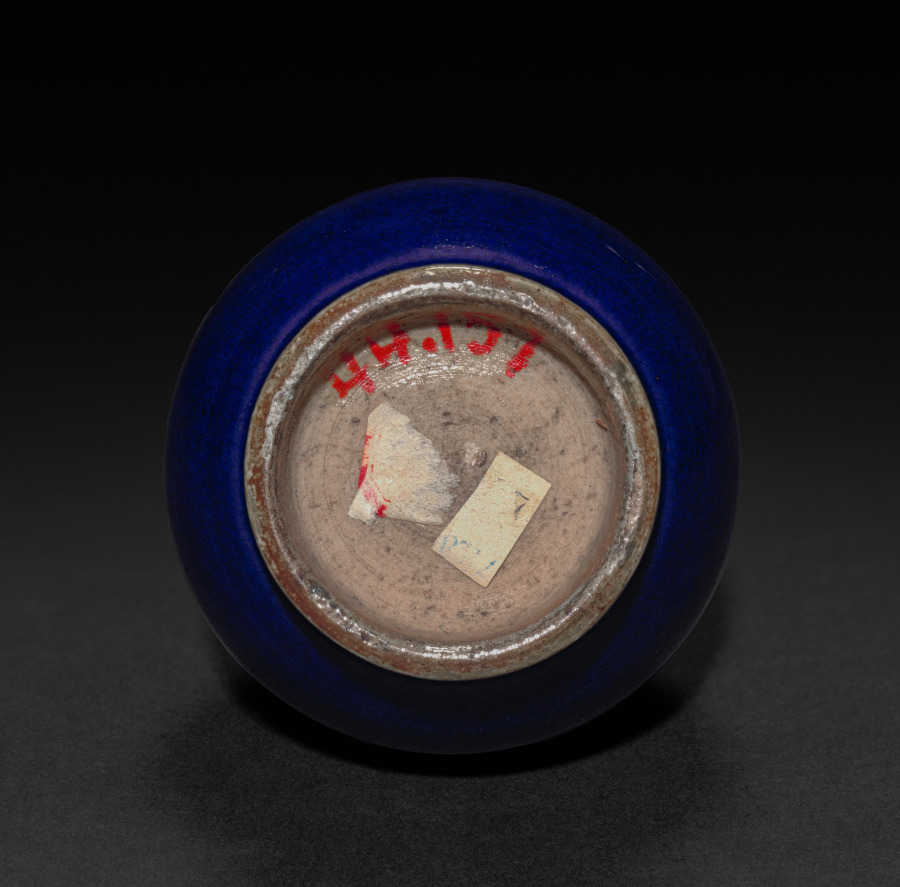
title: Bottle-Shaped Vase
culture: China, Qing dynasty (1644–1911), Qianlong reign (1736–95)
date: 1736–95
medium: porcelain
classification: Ceramic